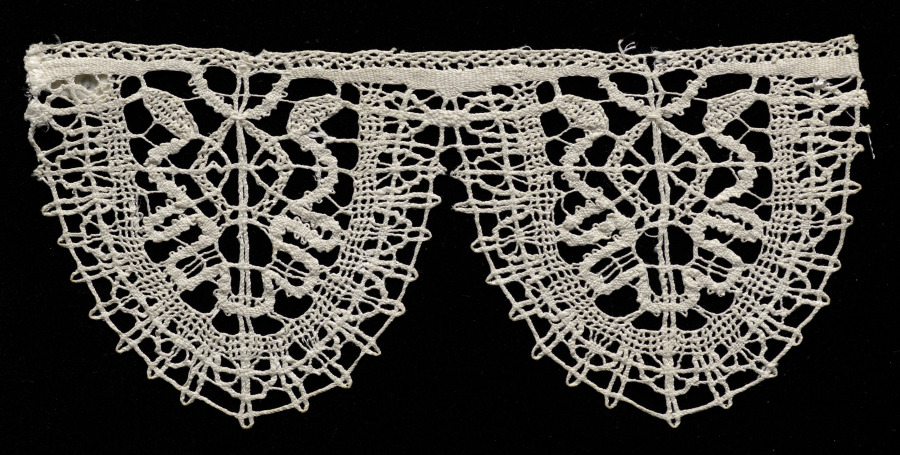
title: Lace Edging of Round Points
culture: Italy, Genoa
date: 1600s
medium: Bobbin lace (rose lace)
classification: Lace